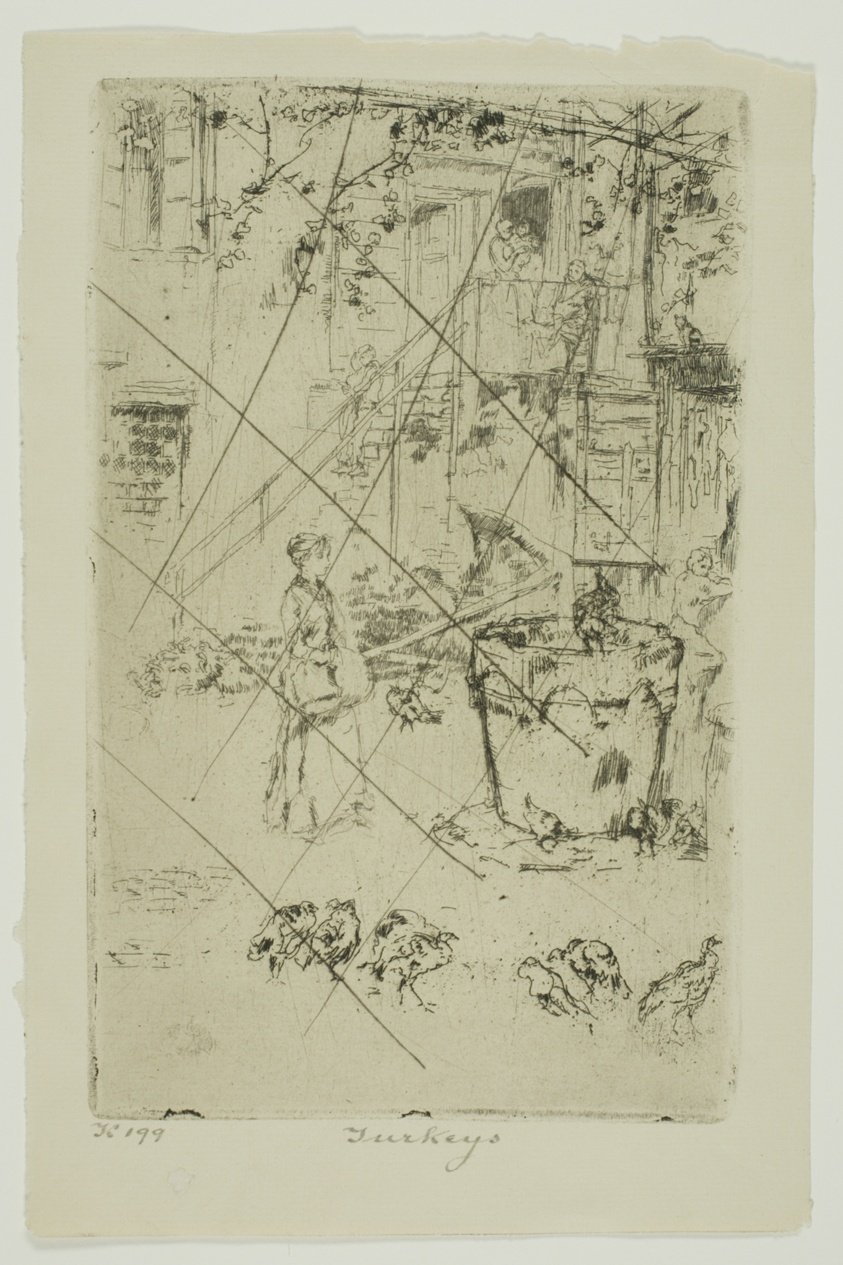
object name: Print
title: Turkeys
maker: James McNeill Whistler (American, 1834-1903)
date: 1880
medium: Etching and drypoint with foul biting, with drypoint cancellation, in black ink on ivory laid paper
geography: United States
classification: etching; print; prints and drawing; foul biting; drypoint; paper